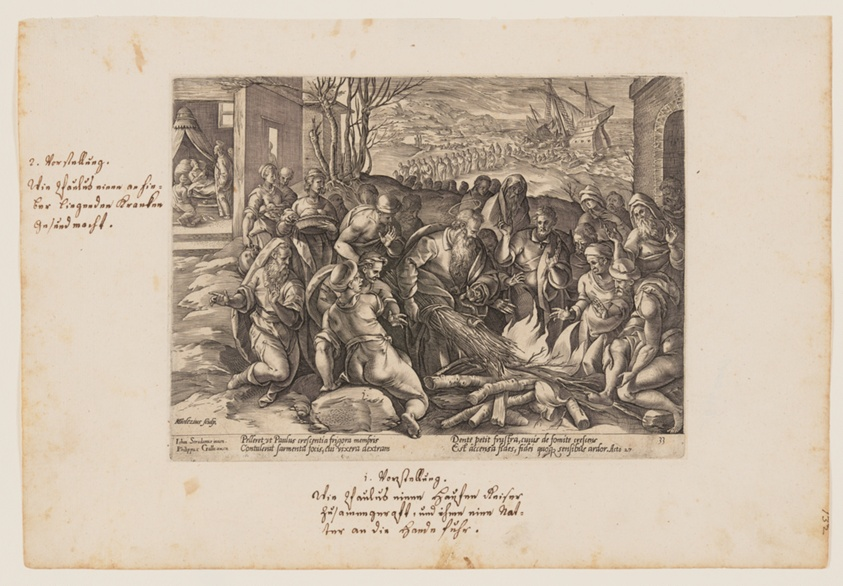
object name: Print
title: St Paul Bitten by the Viper, from Acta Apostolorum (The Acts of the Apostles)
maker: Hendrick Goltzius (Dutch, 1558–1617); after Jan van der Straet (Flemich, 1523–1605)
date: 1582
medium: Engraving on ivory laid paper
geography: Netherlands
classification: engraving; paper; print; prints and drawing